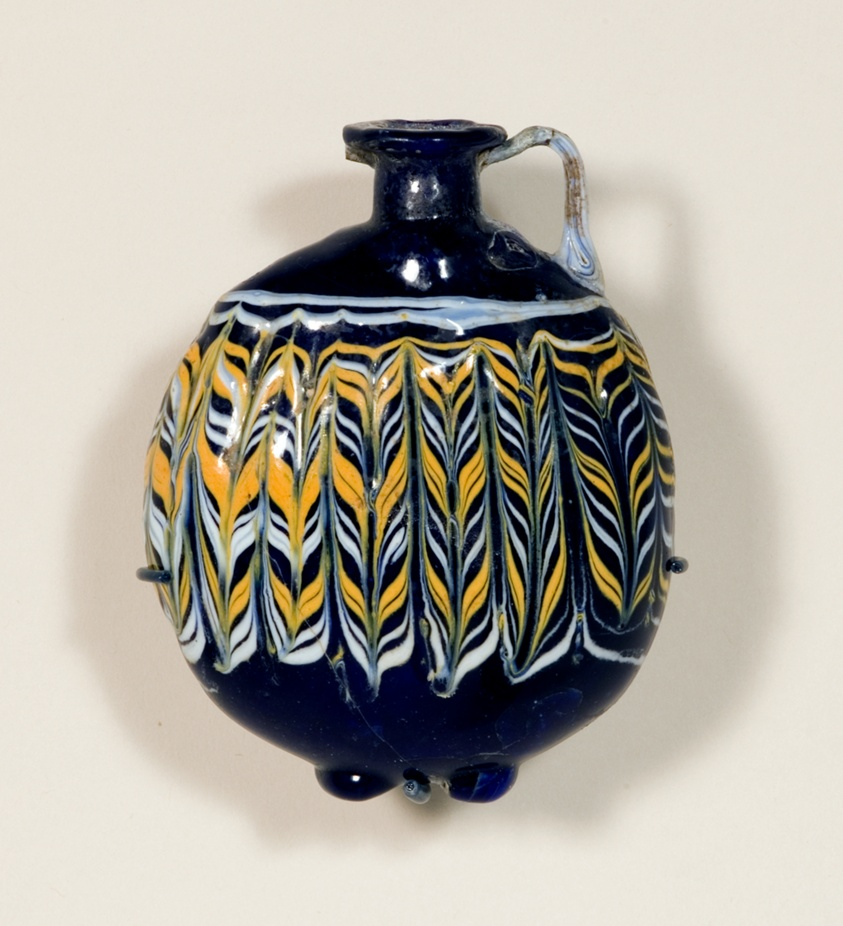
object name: Vessel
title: Lentoid Aryballos (Container for Oil)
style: late period (egyptian)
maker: Eastern Mediterranean or Italian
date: 4th-3rd century BCE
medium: Glass, core-formed technique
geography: Eastern Mediterranean Region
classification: vessel; glass; ancient art